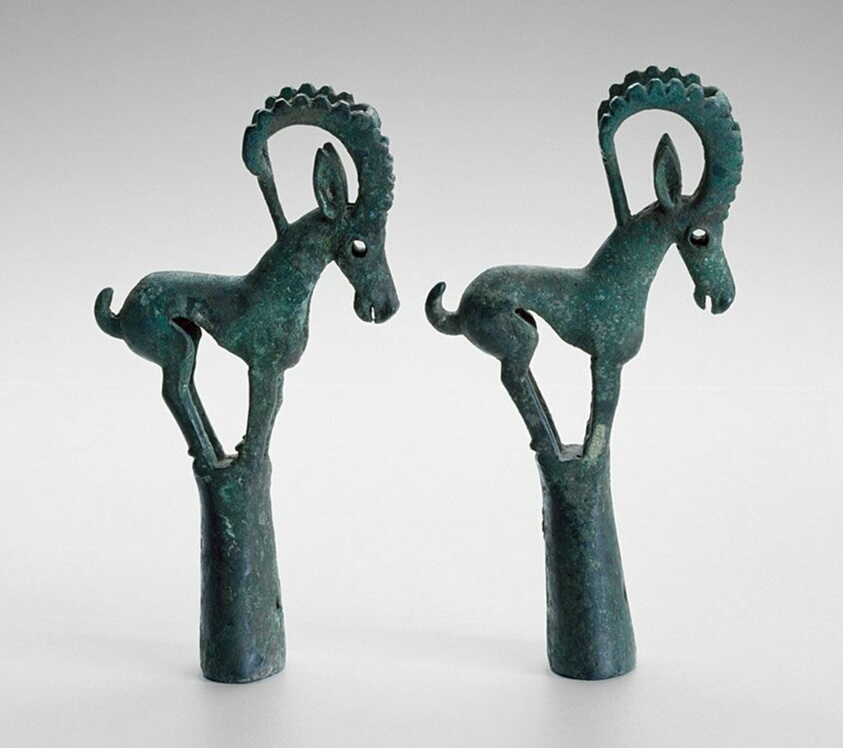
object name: Metalwork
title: Pole Top with Ibex (Mountain Goat) (one of pair)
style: Chinese (culture or style)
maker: Northern China or Eurasian Steppes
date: 6th/4th century B.C.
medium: Bronze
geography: China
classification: bronze; metal; decorative object/ornament; asian art; metalwork